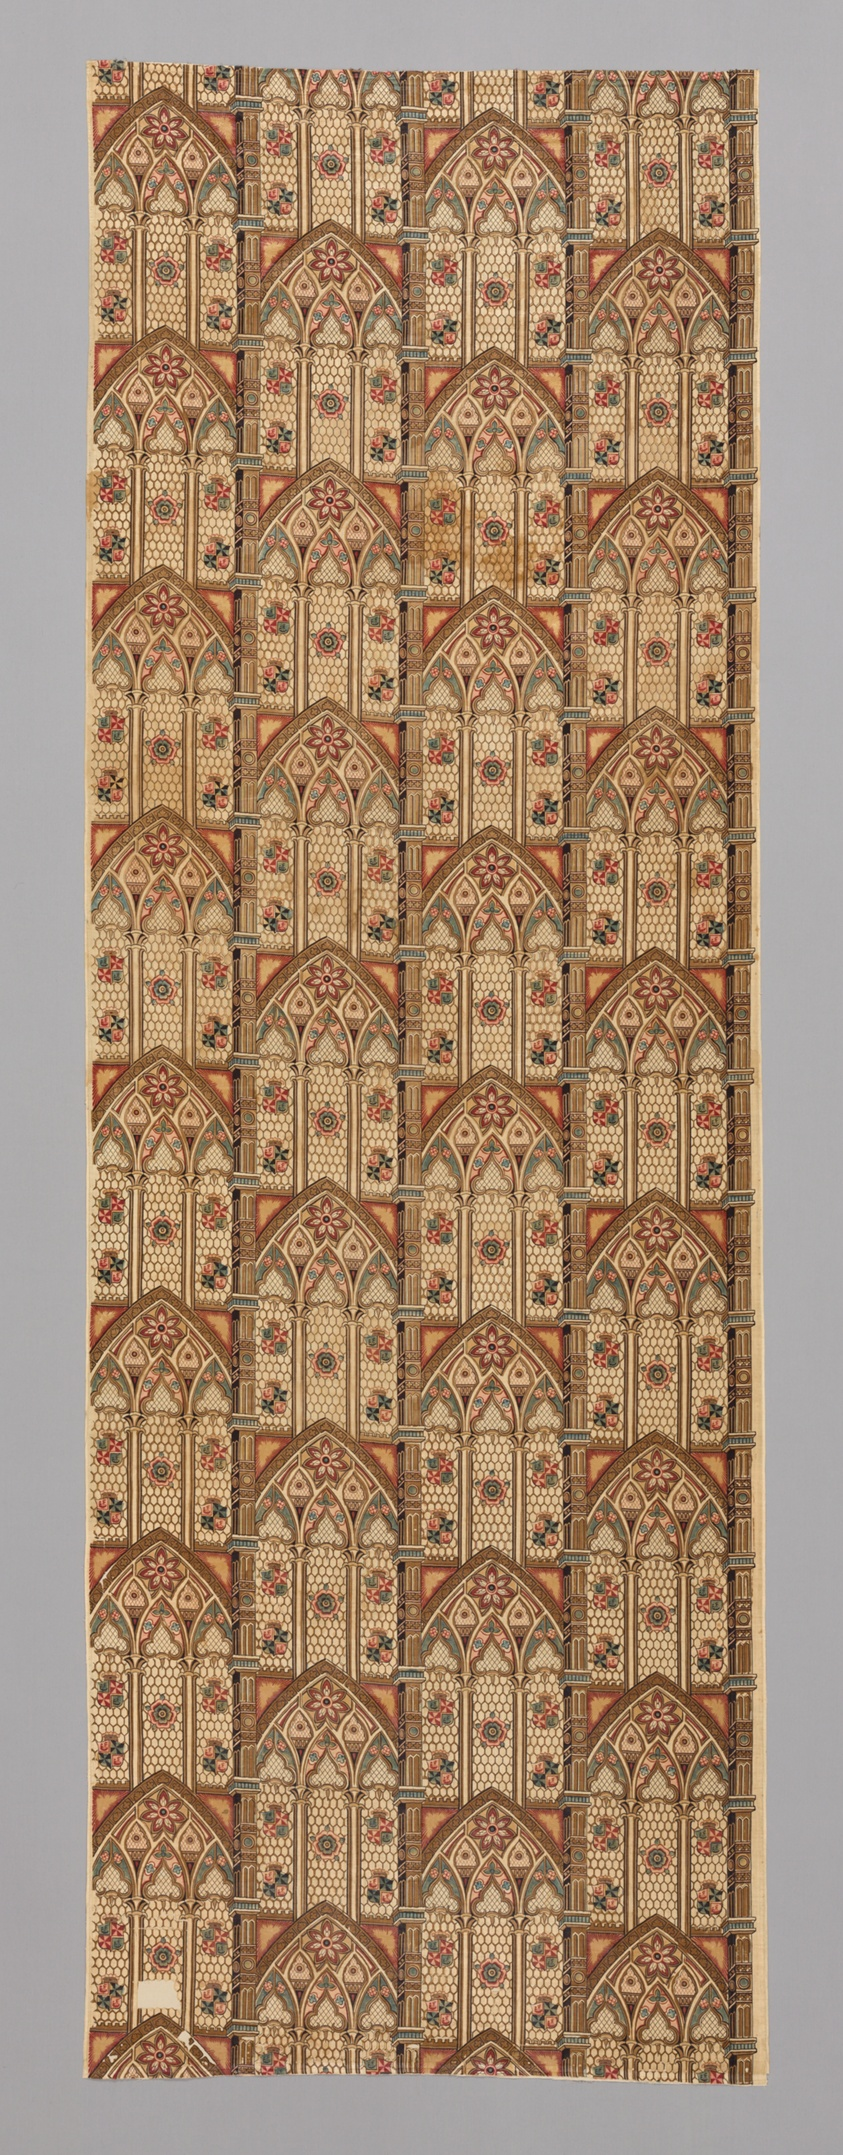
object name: Textile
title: Gothic Arches (Furnishing Fabric)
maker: England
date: 1830/35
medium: Cotton, plain weave; roller and possibly block printed; glazed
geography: England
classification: textile; weaving - printed; furnishing textile